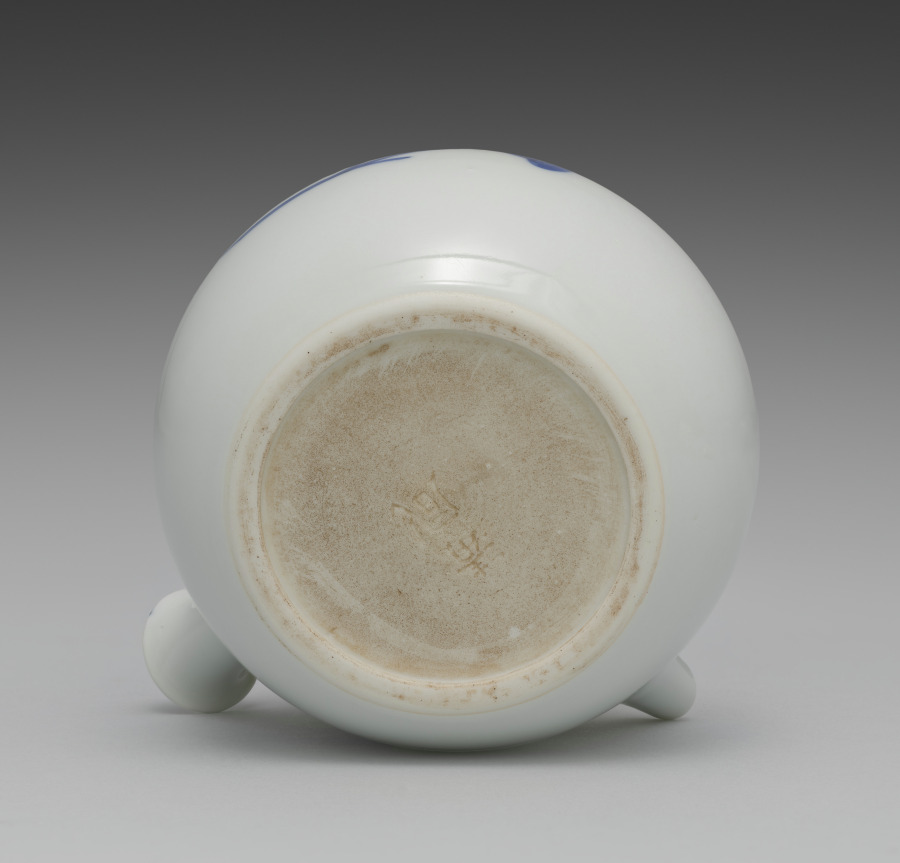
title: Teapot from Tea Set with Orchids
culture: Japan, Meiji period (1868–1912)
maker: Seifū Yohei III (Japanese, 1851–1914)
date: c. 1893–1914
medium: Porcelain with underglaze blue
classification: Ceramic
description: Although the teapot here is stored in a separate box from the five cups, these six pieces may once have been part of a tea set that included other tools such as a water cooler. The teacups have orchid flowers on both sides in underglaze blue, as well as a blue band inside the footring. The teapot has the same design and a blue band painted around the bottom of the lid’s knob. The cups’ long wood storage box is stamped on the exterior, over the lid and base, with a small red seal reading “Satō.” The same seal appears on five small squares of yellow textile, one placed in the bottom of each compartment in the teacup storage box. These are additional to the customary yellow cloths stamped with a “Seifu” seal. Interestingly, four of the Seifū cloths are stamped with an ovoid seal, while the remaining cloth, which is a slightly lighter color, has an unusual seal that is not quite gourd-shaped and with the fū of Seifū in a stylized, unrecognizable form. The teapot has its own box with a Satō seal and is wrapped with an orange textile stamped with the same unusual Seifū seal. A set with a very similar surface design is in the Brooklyn Museum. The Brooklyn set has a water cooler and a small pitcher, in addition to the teapot and cups, and all are in a single storage box. This box records the tea tools as made with kanpakuji, or “bright-jewel white porcelain,” counted among Yohei III’s most important inventions, and carved images. In fact, both sets have a white surface much closer in coloration to the cool white of porcelain clay used in Kyoto at the time, and the designs are simply painted. The Brooklyn set was thus likely mismatched at some point with a box intended for another tea set. Nonetheless, the box may have helped prevent the set’s original components from being dispersed, and the set itself provides insight into how the other tools from the present set may have looked.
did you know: This tea set with orchids has a side-handled pot called a kyūsu, used for steeping, straining, and serving tea.